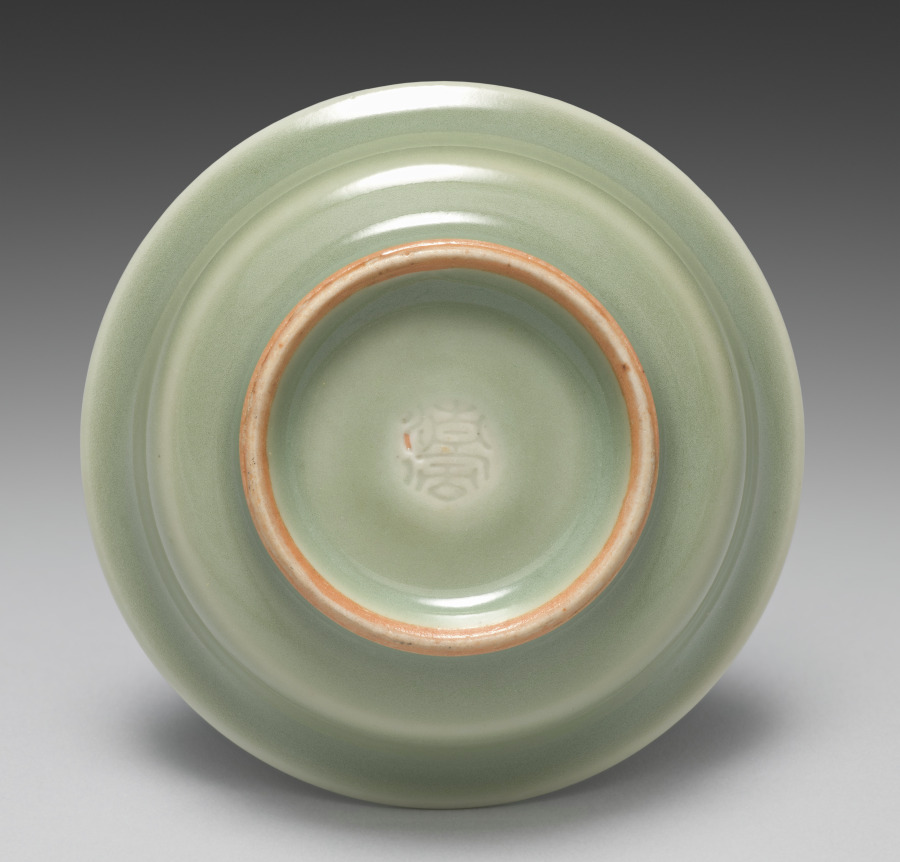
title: Saucer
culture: Japan, Meiji period (1868–1912)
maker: Seifū Yohei III (Japanese, 1851–1914)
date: 1893–1914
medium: One from a set of ten dishes; porcelain with green glaze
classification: Ceramic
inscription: 清風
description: Yohei III’s main output for his sophisticated clientele was in the form of tea sets and dining sets. He created a range of dishes in green glazes. He often produced in pairs, sets of five, or sets of ten. For this set of ten small dishes in a simple, round form that emphasizes the glaze above all, the box lid designates the piece as seiji, or green-glazed porcelain, using a general term for the extensive palette of green glazes often called celadon in English. The box lid further identifies the dishes themselves as tōchō, literally “bean-sized saucers,” a size that makes them suitable for dipping sauces.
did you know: The ten dishes in this set are stored in stacks of five in a two-compartment box.